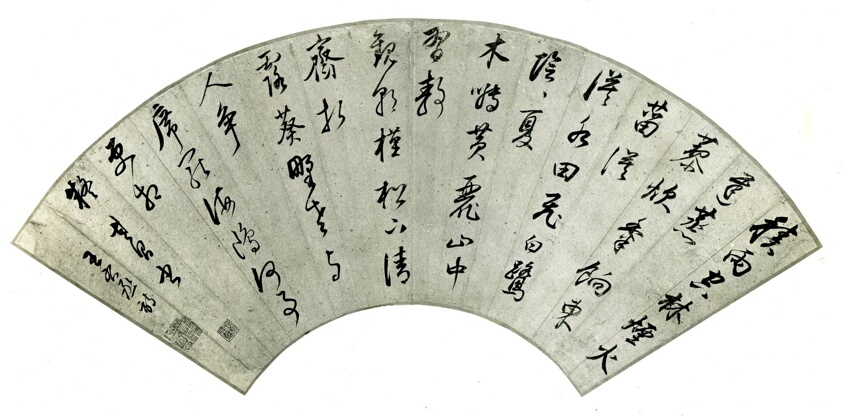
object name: Painting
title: Calligraphy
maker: Attributed to Dong Qichang (Chinese, 1555-1636)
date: Ming Dynasty(1368–1664);1555–1636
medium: Fan painting; ink on gold paper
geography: China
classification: album leaf; painting; asian art